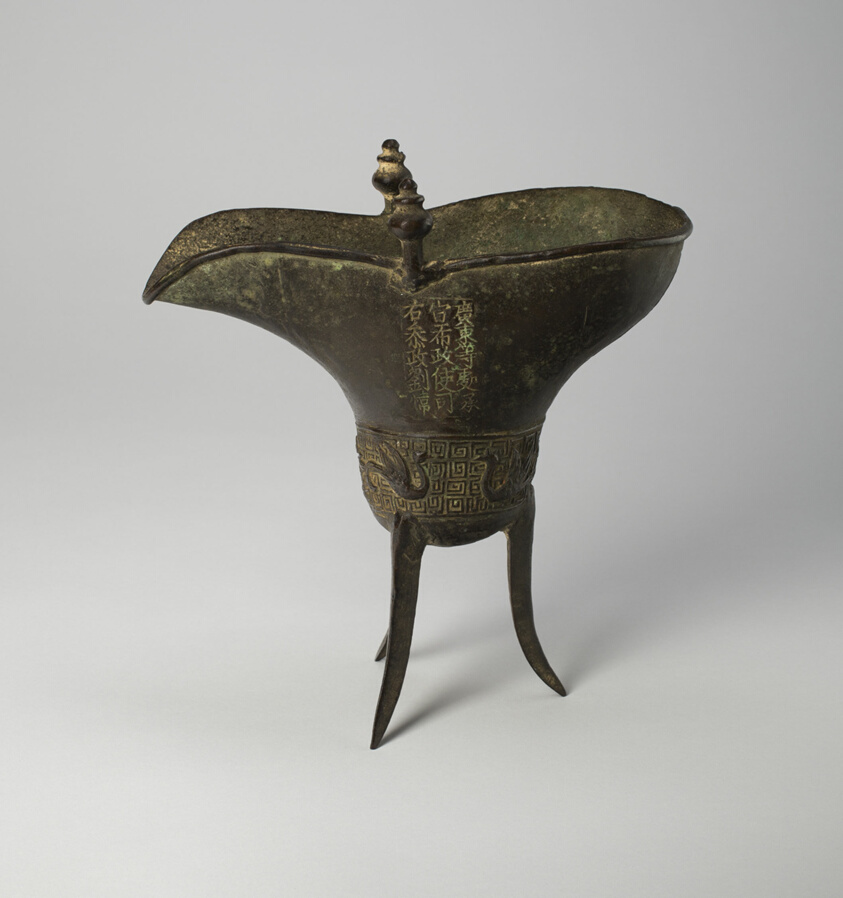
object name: Vessel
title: Goblet (jue)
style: Chinese (culture or style)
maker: China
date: Ming dynasty, Tianshun period (1457–1464), 1464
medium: Bronze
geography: China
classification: vessel; bronze; metal; asian art